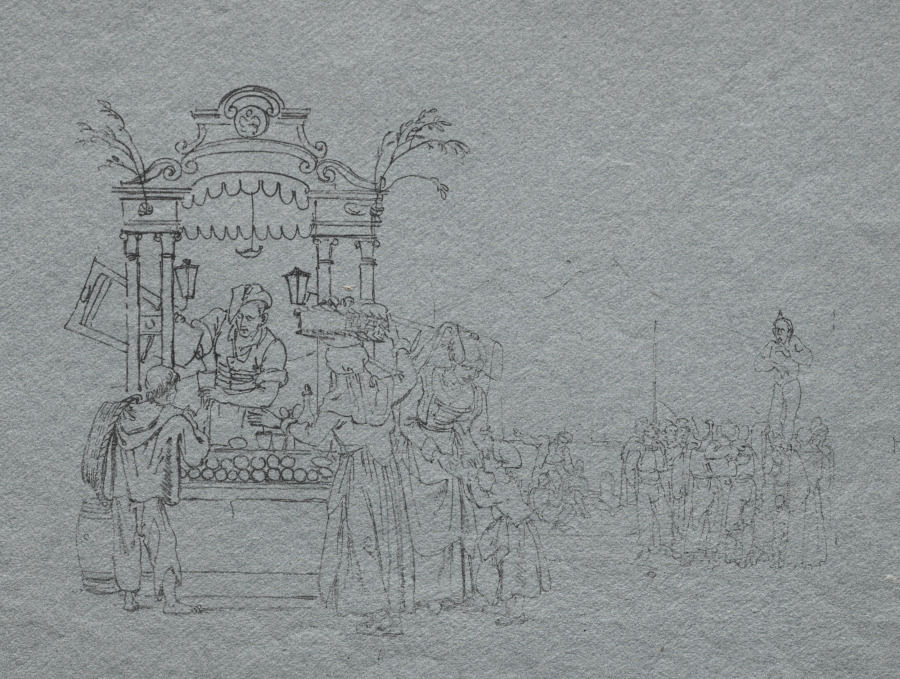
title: Fruit Vendor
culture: Italy, 19th century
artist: Bartolomeo Pinelli (Italian, 1781–1835)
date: early 1800s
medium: lithograph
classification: Print